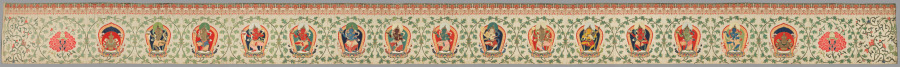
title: Brocaded Strip, known as "Imperial Tribute Brocade"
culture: China, Qing dynasty (1644-1911)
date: c. 1770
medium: brocaded satin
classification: Textile